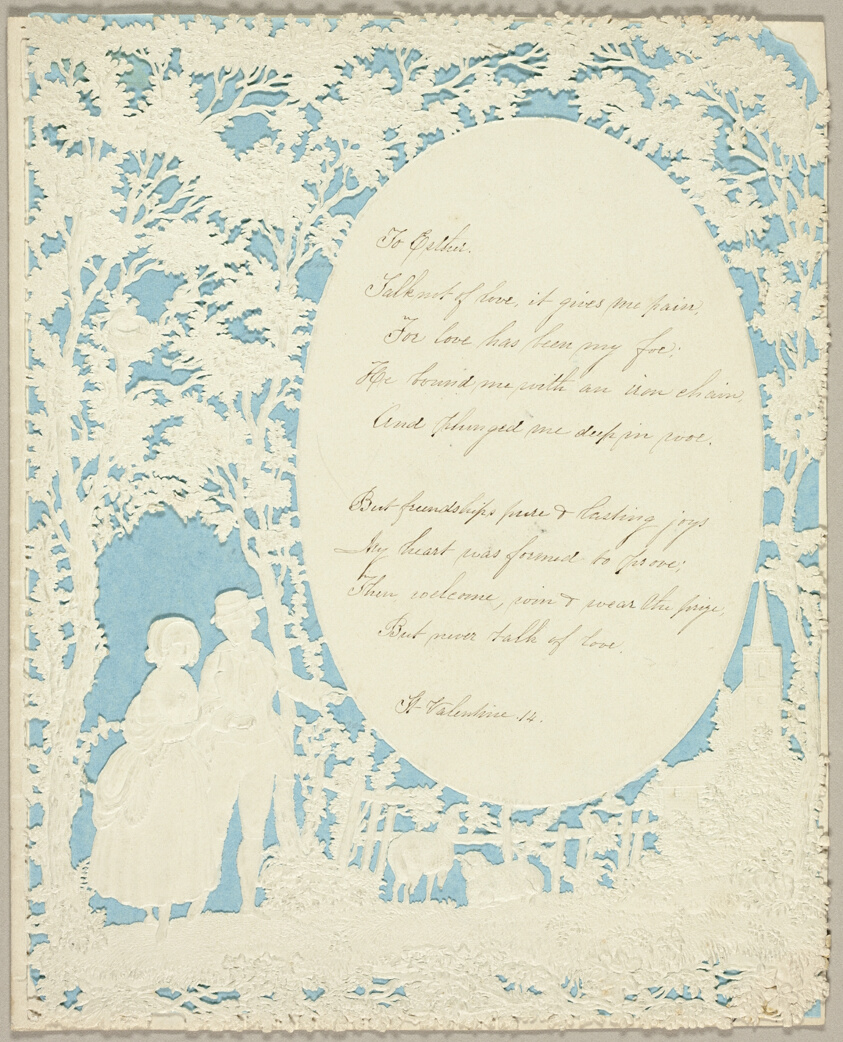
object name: Drawing and Watercolor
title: To Esther (Valentine)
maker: Joseph Mansell (English, 19th century)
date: c. 1850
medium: Pen and brown ink on cut and embossed (designed) ivory wove paper (folded), with a blue wove paper insert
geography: England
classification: valentine; prints and drawing; paper